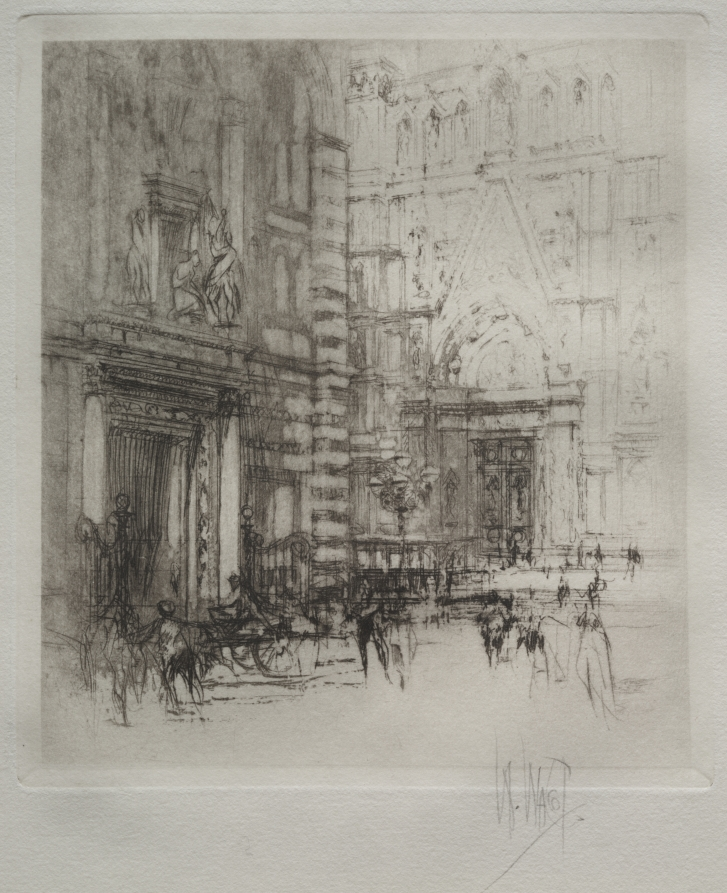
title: The Baptistry, Florence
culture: England, 20th century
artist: William Walcot (British, 1874–1943)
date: 1920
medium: drypoint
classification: Print